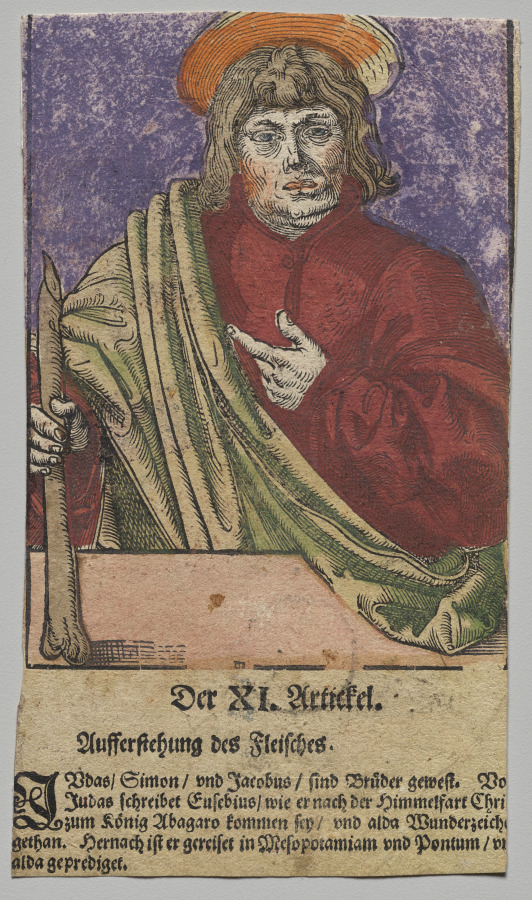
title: Jude from Christ, the Apostles, and Saint Paul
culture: Germany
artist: Lucas Cranach the Elder, After (German, 1472–1553)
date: 1563/64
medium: Woodcut with letterpress text, hand colored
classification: Print